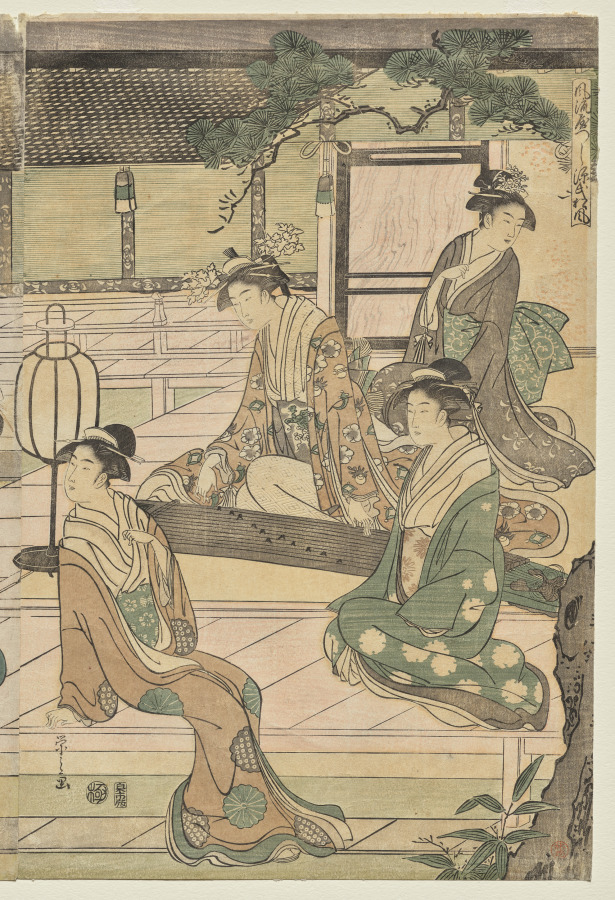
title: The Matsukaze Chapter of the Tale of Genji (from the series The Tale of Genji in Elegant Modern Dress)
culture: Japan, Edo period (1615–1868)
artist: Chōbunsai Eishi (Japanese, 1756–1829)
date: c. 1791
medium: color woodblock print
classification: Print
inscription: Signature: Eishi ga Publisher: Izumiya Ichibei (Senichi han) Seal: kiwame